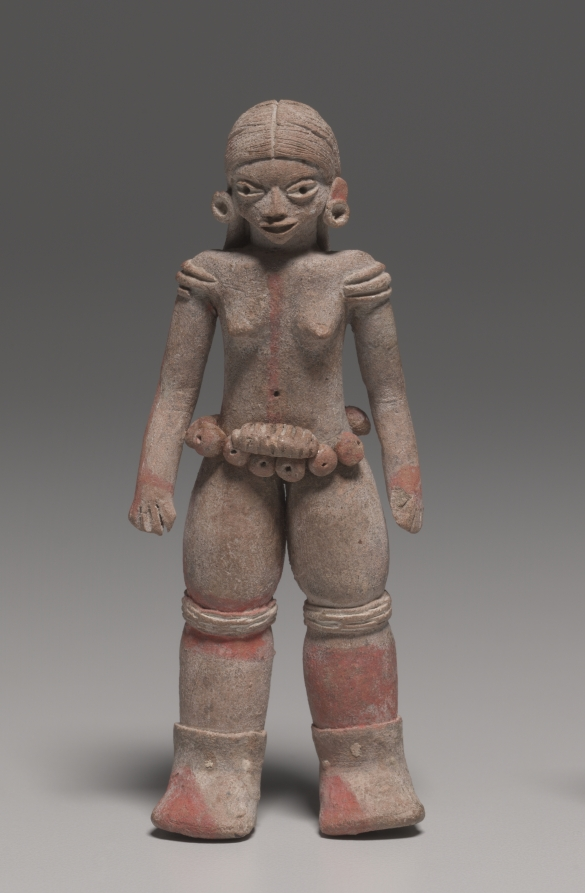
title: Female Figurine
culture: Mexico, Guerrero, Xalitla, Xochipala style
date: c. 1500–500 BCE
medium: earthenware with pigment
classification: Sculpture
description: This delicately beautiful figurine portrays an adolescent girl wearing only boots, a belt, jewelry, and cinnabar paint. The sensitive modeling of the face and body is enhanced by the meticulous detailing of applied elements such as the coiffure and belt.